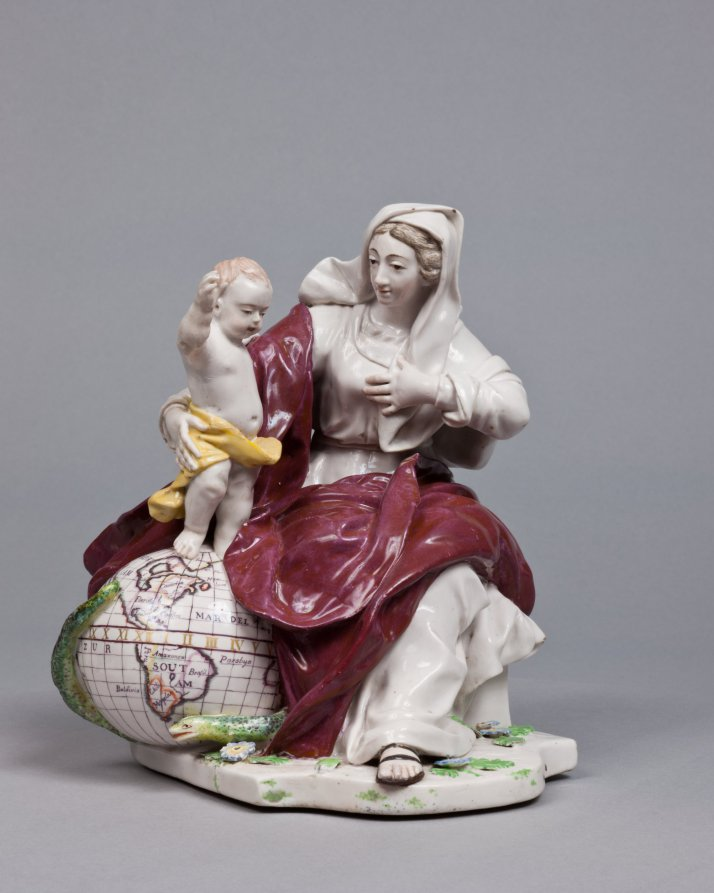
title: Madonna and Child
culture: England, Chelsea, 18th century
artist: Chelsea Porcelain Factory (Britain, London, 1745–84)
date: c. 1755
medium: porcelain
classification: Ceramic